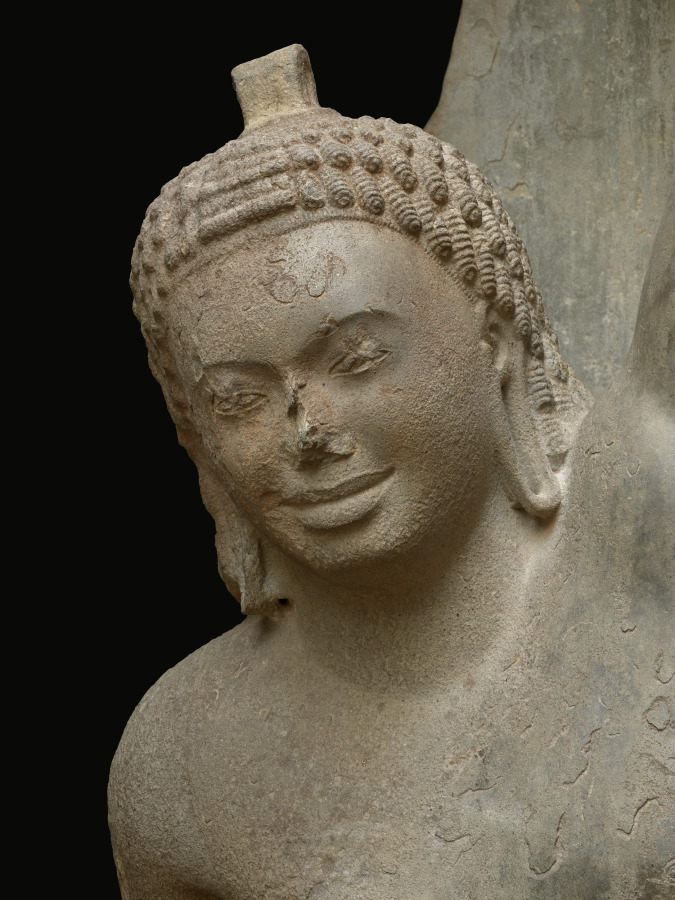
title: Krishna Lifting Mount Govardhan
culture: Southern Cambodia, Takeo Province, Phnom Da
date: c. 600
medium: Sandstone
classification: Sculpture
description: This masterwork of early Cambodian sculpture shows the Hindu god Krishna effortlessly holding aloft a mountain to protect his fellow villagers and herds from torrential storms sent by a jealous old god. It is one of eight monumental monolithic figures recovered from a two-peaked mountain in the floodplains of the Mekong River delta, on the outskirts of the ancient urban center of Angkor Borei.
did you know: Gold earrings were once fastened to the sculpture using holes in the figure's earlobes.